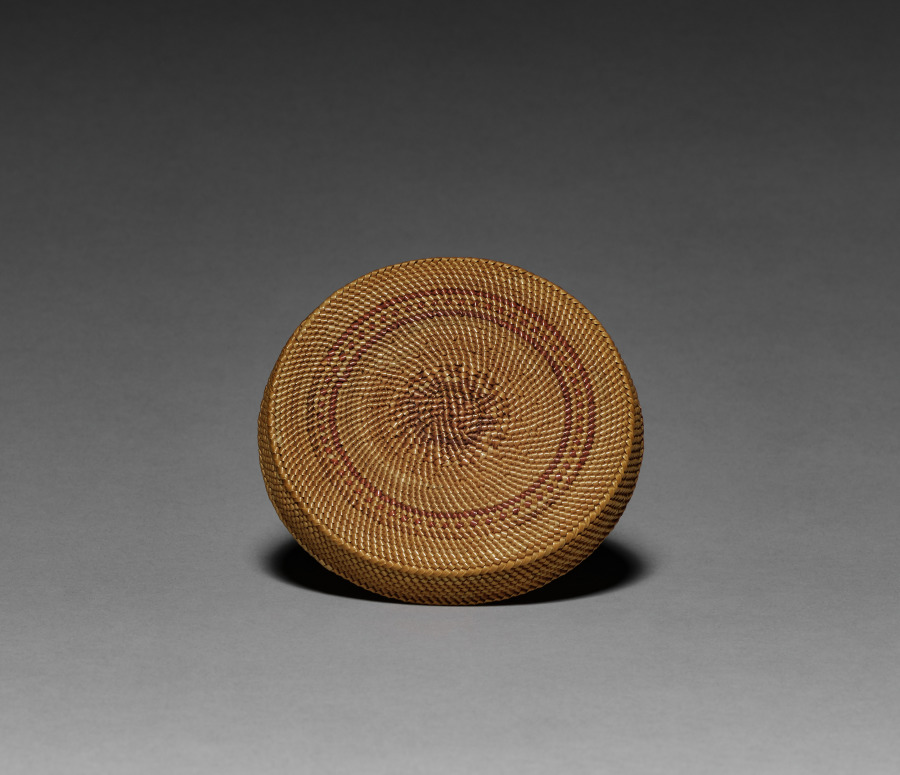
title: Cover for a Bowl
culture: Northwest Coast, Vancouver Island, late 19th century (?)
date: c 1875– 1900 ?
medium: twined grass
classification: Basketry